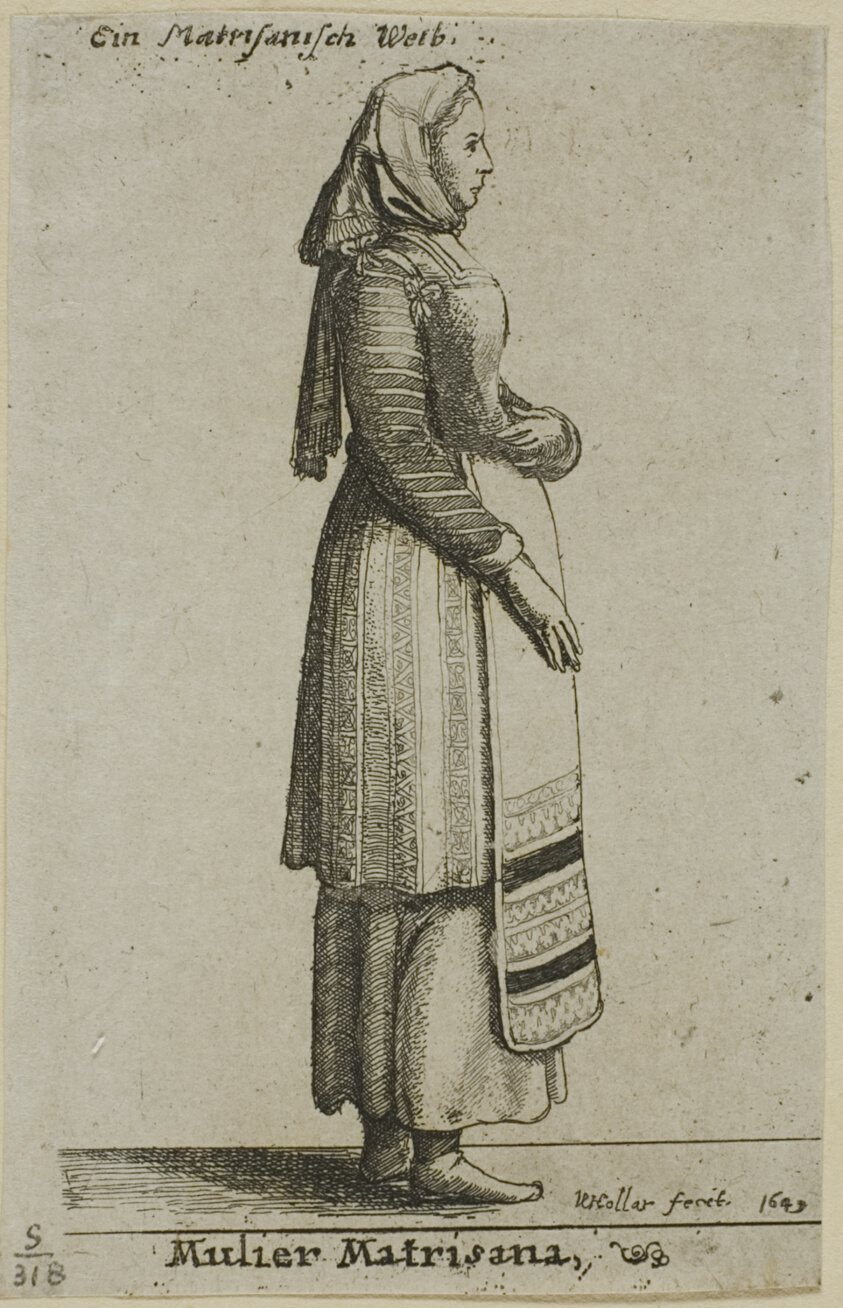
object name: Print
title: Hungarian Woman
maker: Wenceslaus Hollar (Bohemian, 1607-1677)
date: 1649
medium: Etching on gray Asian paper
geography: Bohemia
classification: etching; print; prints and drawing